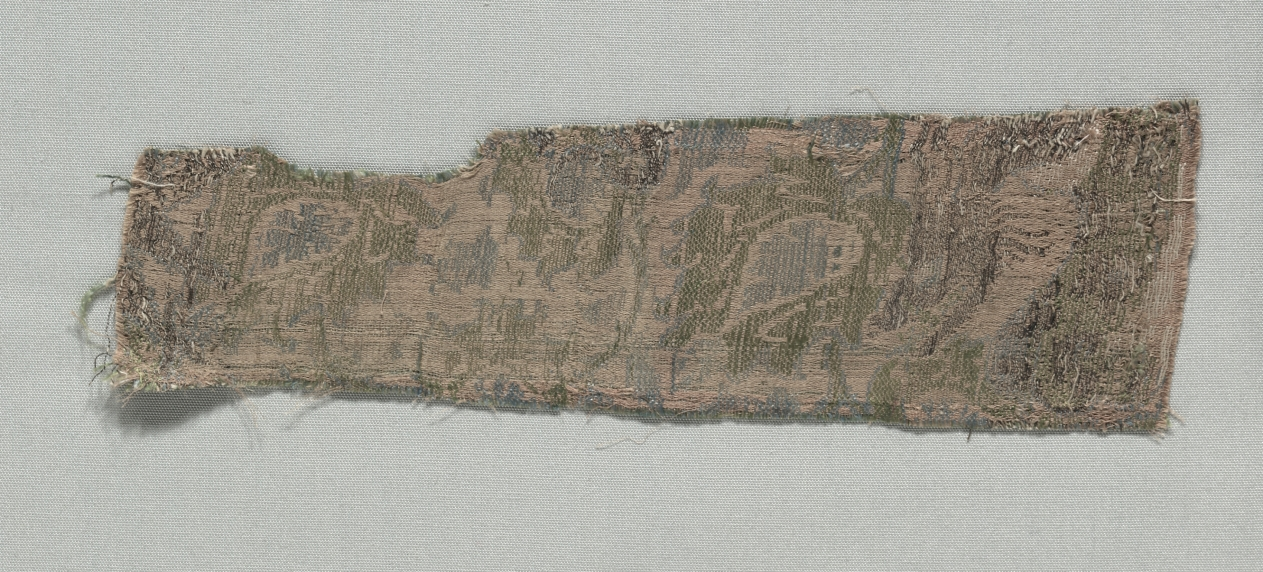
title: Three Fragments of Italian Gothic Silk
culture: Italy, second half of 14th century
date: 1350–1399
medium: lampas weave, brocaded; silk and gold thread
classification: Textile